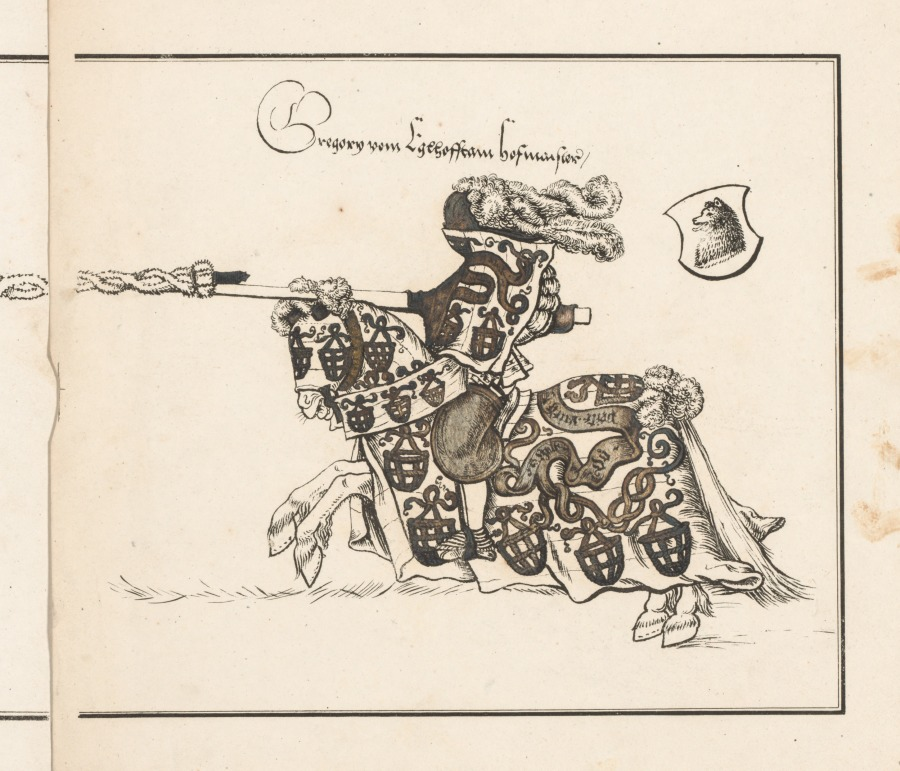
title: Book on Tournaments: Jouster Facing Left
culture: Germany, 19th century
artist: Theobald Senefelder (German, 1777–1846)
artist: and Clemens Senefelder (German, 1778–1813)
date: 1817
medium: lithograph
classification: Print